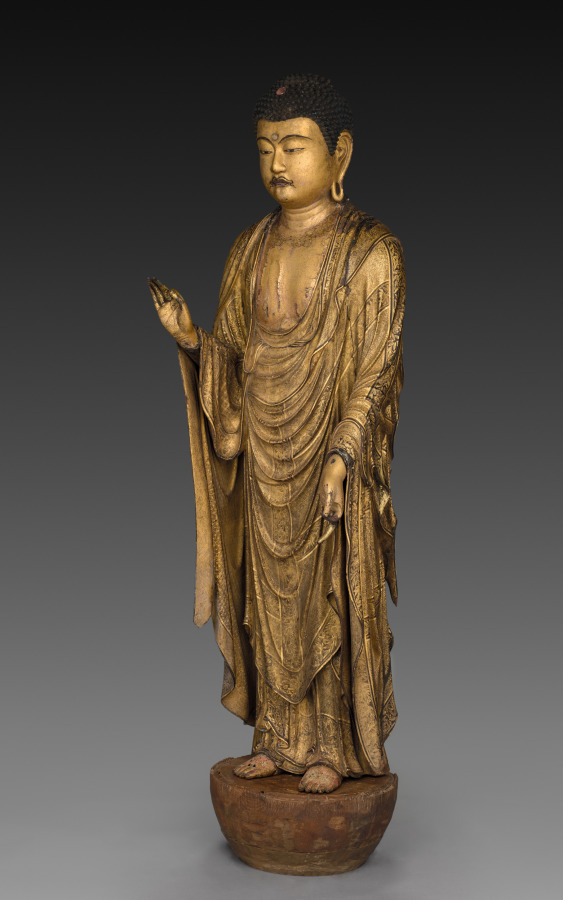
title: Buddha of Infinite Life and Light (Amida Nyorai)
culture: Japan, Kamakura period (1185–1333)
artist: Kōshun (Japanese, active mid-1200s)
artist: assisted by Koshin (Japanese, active mid-1200s)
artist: assisted by Joshun (Japanese, active mid-1200s)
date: 1269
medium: Cypress with lacquer, color, gold, cut gold, rock-crystal inlaid eyes, and quartz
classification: Sculpture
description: This ornate Buddha Amida stands in a posture of welcome, greeting the dying who will accompany him back to his Pure Land. Documents inserted into the sculpture’s hollow core around the time of its creation include a copy of the sacred text Amida Sutra, a register of donors who desired to be joined together in generating karmic merit (kechien) through the creation and dedication of the sculpture, and a record asserting that the image was completed over the course of 33 days in 1269 at Shitennōji Temple in Osaka.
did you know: The lead sculptor was Kōshun, who had been granted the lofty title “Bridge of the Law.”